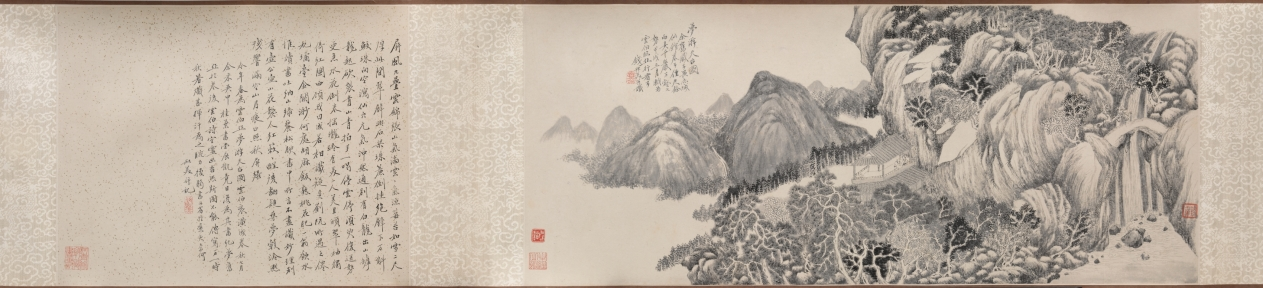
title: Dream Journey to Mt. Tiantai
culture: China, Qing dynasty (1644-1911), Jiaqing reign (1796-1820)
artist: Qian Du (Chinese, 1763–1844)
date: 1814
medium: handscroll; ink on paper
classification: Painting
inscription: 夢游天台圖. 余舊藏子畏赤城仙館卷子，僅尺餘而具千巖萬壑之勢。甲戌三月，戲為雲伯臨作行看子。錢叔美并識。[印]壺公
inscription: 今年春為雲伯作夢游天台圖，雲伯裝淇成卷。秋七月，余來吳中桂葉書堂，展玩竟日後，為其書紀舊作於卷後。雲伯詩空靈出杳，恐斯圖不能傳寫萬一。時秋暑熾甚，揮汗為之，腕力復弱，書又劣於畫，夫奈何。叔美并記。[印]叔美 [印, 右下]錢叔美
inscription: 屏風九疊雲錦張，山氣滃雲雲氣涼。/ 莓苔如席二尺厚，此間翠壁非石梁。/ 珠簾倒挂絕壁下，萬斛鮫珠向空瀉。/ 仙穴元氣沖然通，別有白龍出山罅。/ 龍起欲裂青山青，拍手一喝停雲停。/ 須臾復迸勢更急，水花倒捲搖瓏玲。/ 有美一人美且頎，翠袖獨倚紅闌西。/ 顧我目成若相識，疑是劉阮所遇之仙妃。/ 瓊臺金闕渺何處，胡麻飯熟桃花肥。/ 一翁飲水惟讀書，吐納山綠餐松腴。/ 書中所言不盡識，妙理必有壺公壺。/ 山花襲人紅蔌蔌，醒後翻疑尋夢轂。/ 泠然殘響滿空山，月痕正照秋屏綠。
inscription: 3 additional seals unidentified.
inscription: Titleslip by Mo Beiming 莫北溟 (active early 20th century)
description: When he painted Mt. Tiantai 天台山, Qian Du was a mature artist with a distinctive style that balanced refinement and “studied awkwardness.” He included the site’s famed features: the crescent-shaped stone bridge arching across the waterfall and surrounded by dense cliffs. Rows of pine and other vegetation appear in the crevices above and below the mountain. The twisting trunks and branches are left in outline, encased within the variegated foliage. In a pavilion at the center, a man and a woman look back to the lower right, across the ravine and toward the cascading water. Beyond and to the left, two simple mounds are backed by hills that stretch into the distance. Qian Du left space above the hills for an inscription describing the circumstances that gave rise to the painting. Chen Wenshu, family friend and patron to Qian Du, had dreamt of a journey to Tiantai, a mountain famed for both its natural beauty and its associations with legends and myths. This short handscroll was based on Chen’s description of his dream journey, on which he marveled at the scenery and encountered a goddess. Six months after the painting’s completion, Qian transcribed his friend’s longer poetic reminiscence on paper mounted after the painting. The landscape of the painting was not based on the physical site, which likely neither man had visited in 1814, but rather on the mythic tradition of Tiantai. It caused turbulence in the mind of the poet and provided inspiration to the painter.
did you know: The man and woman in the pavilion likely represent Chen Wenshu and the mysterious presence he encountered on his dream journey to Mt. Tiantai.